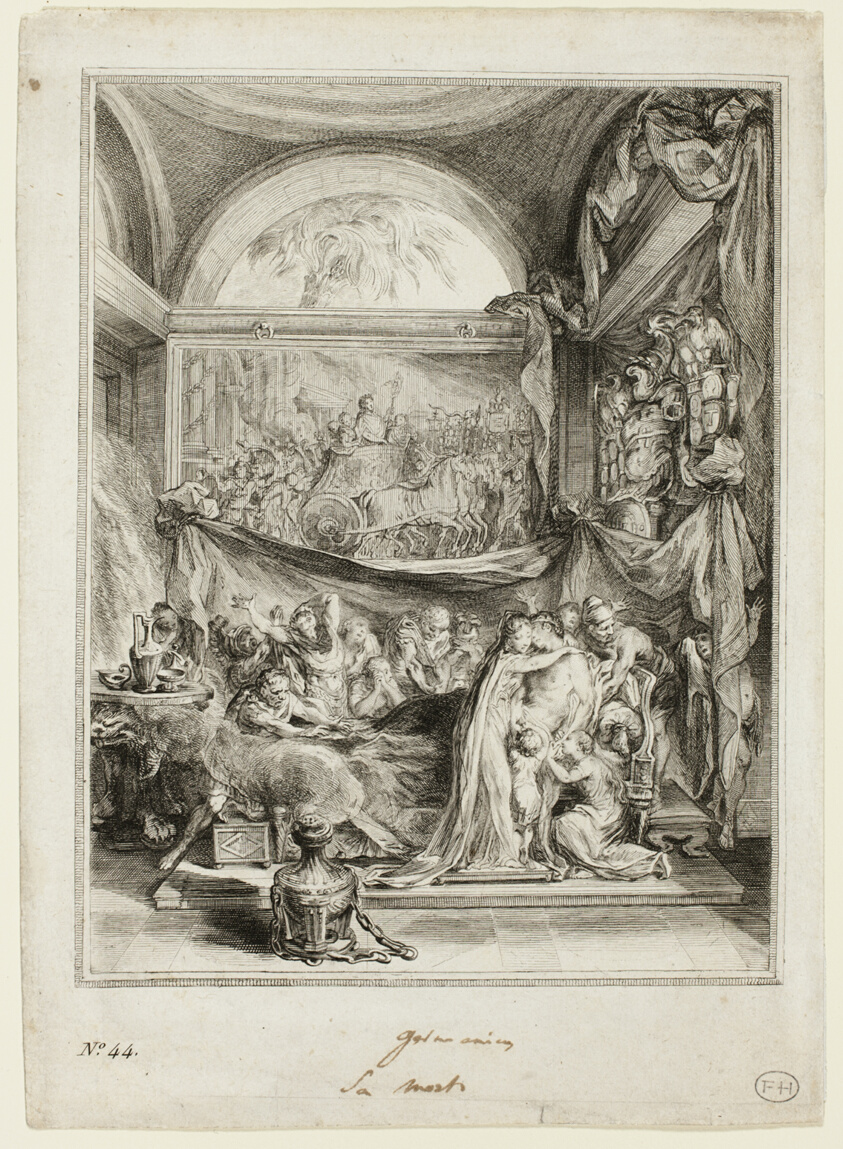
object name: Print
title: The Death of Germanicus, from the Spectacle de l'Histoire Romaine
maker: Gabriel-Jacques de Saint-Aubin; French, 1724-1780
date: 1760/68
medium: Etching in black on ivory laid paper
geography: France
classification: etching; paper; print; prints and drawing